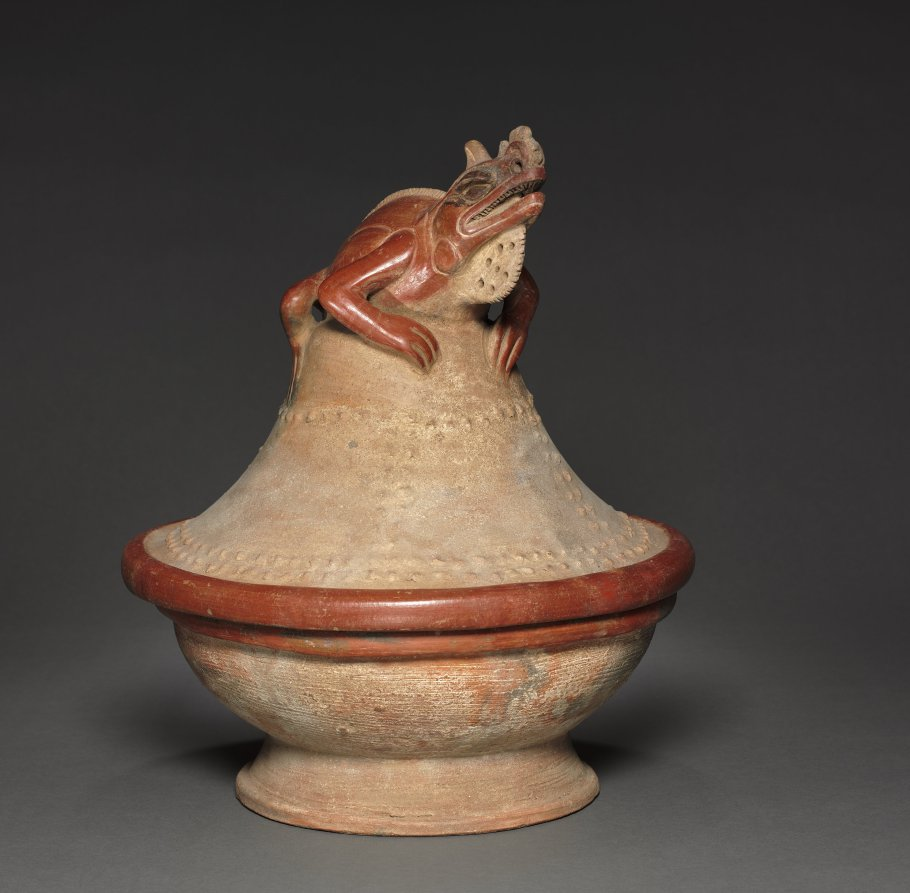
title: Lidded Bowl with Iguana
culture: Costa Rica, Southern Nicoya region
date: c. 600–1100 (Thermoluminescence date, 995–1395)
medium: ceramic, slip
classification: Ceramic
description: At the time of the Spanish conquest in the 16th century, Costa Rican mythology linked iguanas to the sky and to rulers. The earlier makers of this vessel left no written records, but they may have had similar beliefs. The lizard poses as though basking in the sun, a celestial body, and assumes an aggressive stance that could be likened to a ruler's: the teeth and chin under the dewlap are displayed, Also, fine ceramics like this were buried in the graves of the high-status dead, some of them certainly leaders of the several groups that competed in the area.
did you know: Green iguanas can grow to be over 6 feet long.